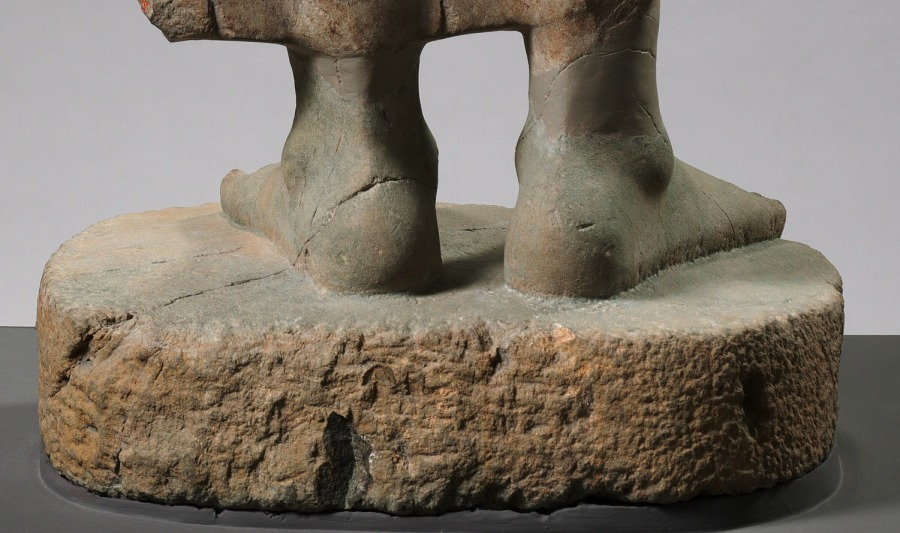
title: Feet for Standing Buddha (1973.15)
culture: Thailand, Mon-Dvaravati Period, c. 7th Century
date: c. 600s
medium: sandstone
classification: Sculpture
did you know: Now united for display, CMA acquired the sculpture in two pieces, when the body (CMA 1973.15) and the feet were found in separate locations.